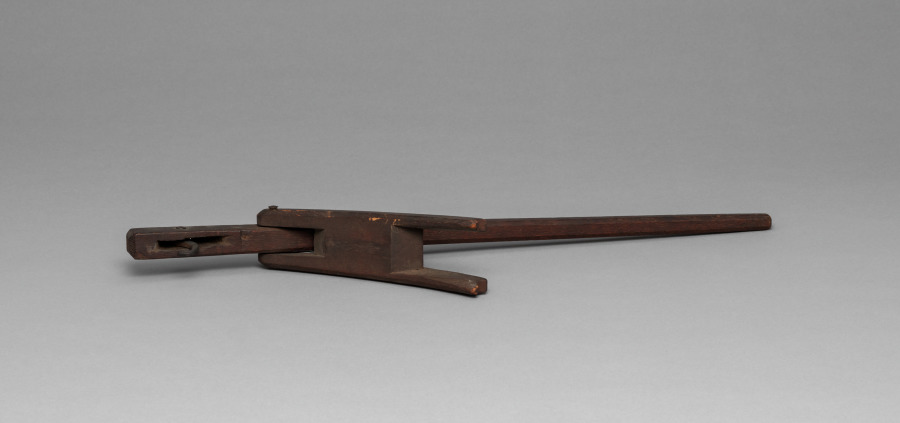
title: Lever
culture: England, 17th century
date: 1600s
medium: stained wood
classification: Arms and Armor